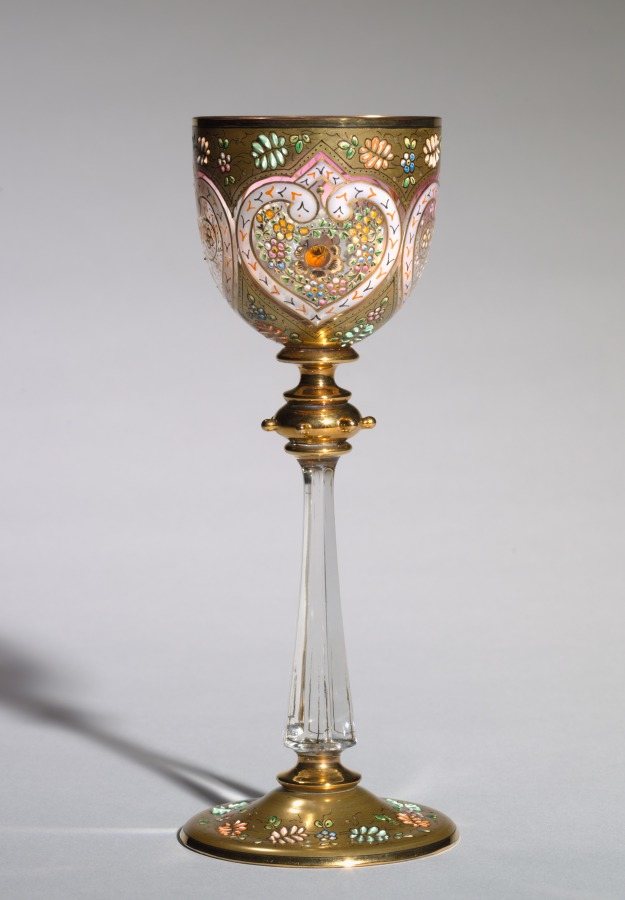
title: Liqueur Glass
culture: Germany, Late 19th- Early 20th century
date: c. 1890–1900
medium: blown glass; gold enamelling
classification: Glass